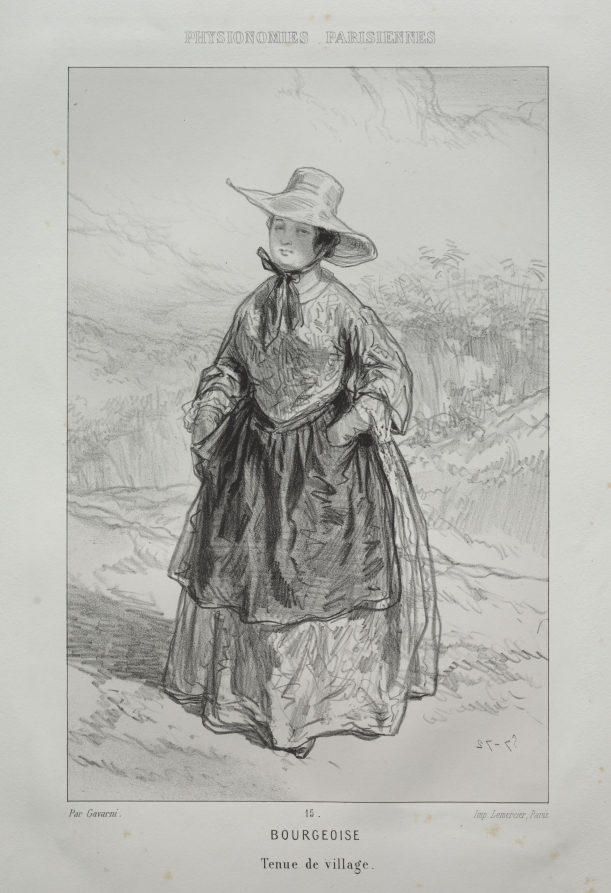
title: Bourgeoise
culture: France, 19th century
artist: Paul Gavarni (French, 1804–1866)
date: c. 1857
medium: lithograph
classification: Print